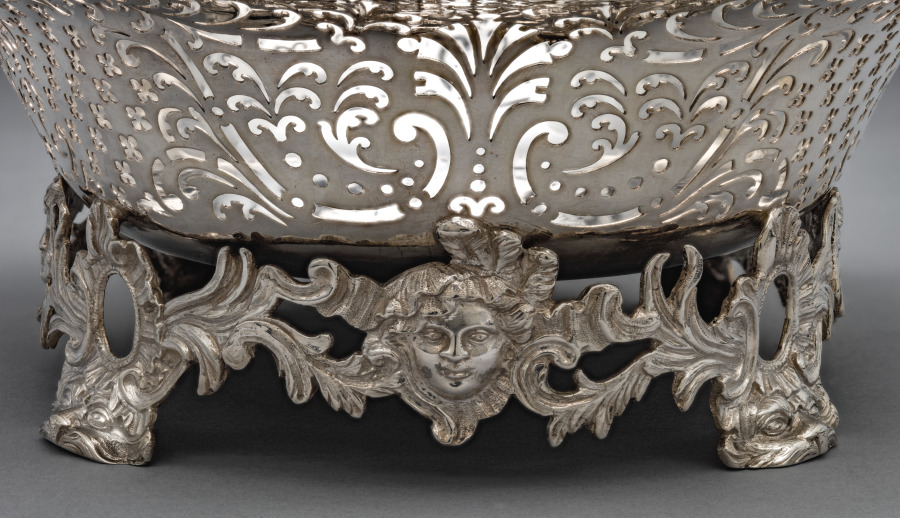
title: Cake Basket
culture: Britain, London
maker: Samuel Herbert and Company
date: 1753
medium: Silver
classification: Silver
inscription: “H/I I”; hallmark for London, George II, Samuel Herbert and Henry Bailey, and date 1753.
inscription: “To/H.H.M./from/S.K., E.W.G., J.H.J., D.R.L., M.B.R./on the occasion of his/Silver Wedding/1911-1936”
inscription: “50-2”; hallmark for London, George II, Samuel Herbert and Henry Bailey, and date 1753.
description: Drinking tea at the end of the day, accompanied by sweet cakes and savory delights, became an established ritual in Britain at all levels of society during the 1700s. In grand houses, silver teapots, caddies, and cake baskets elevated this afternoon refreshment to a formal gathering.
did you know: Sheaves of wheat adorning the rim of this basket allude to the flour used in pastries and cakes for tea.